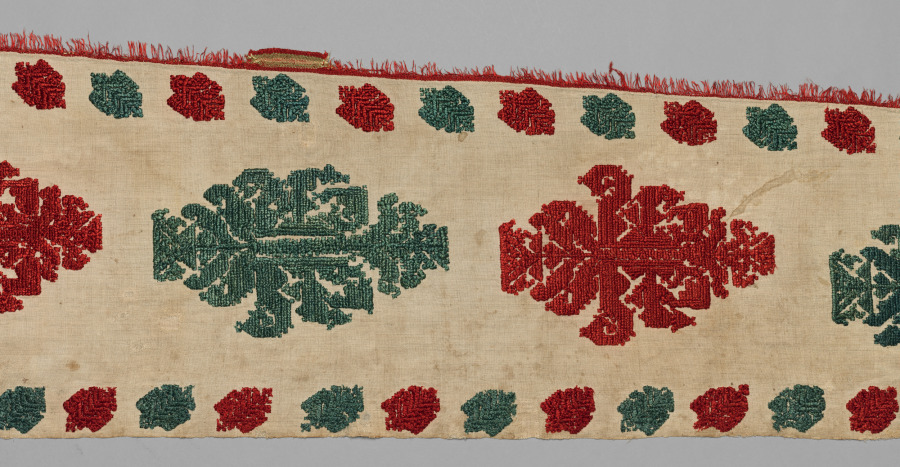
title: Portion of a Bed Tent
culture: Greece, Dodecanese Islands, Rhodes, 18th century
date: 1700s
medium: embroidery: silk on linen tabby ground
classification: Embroidery